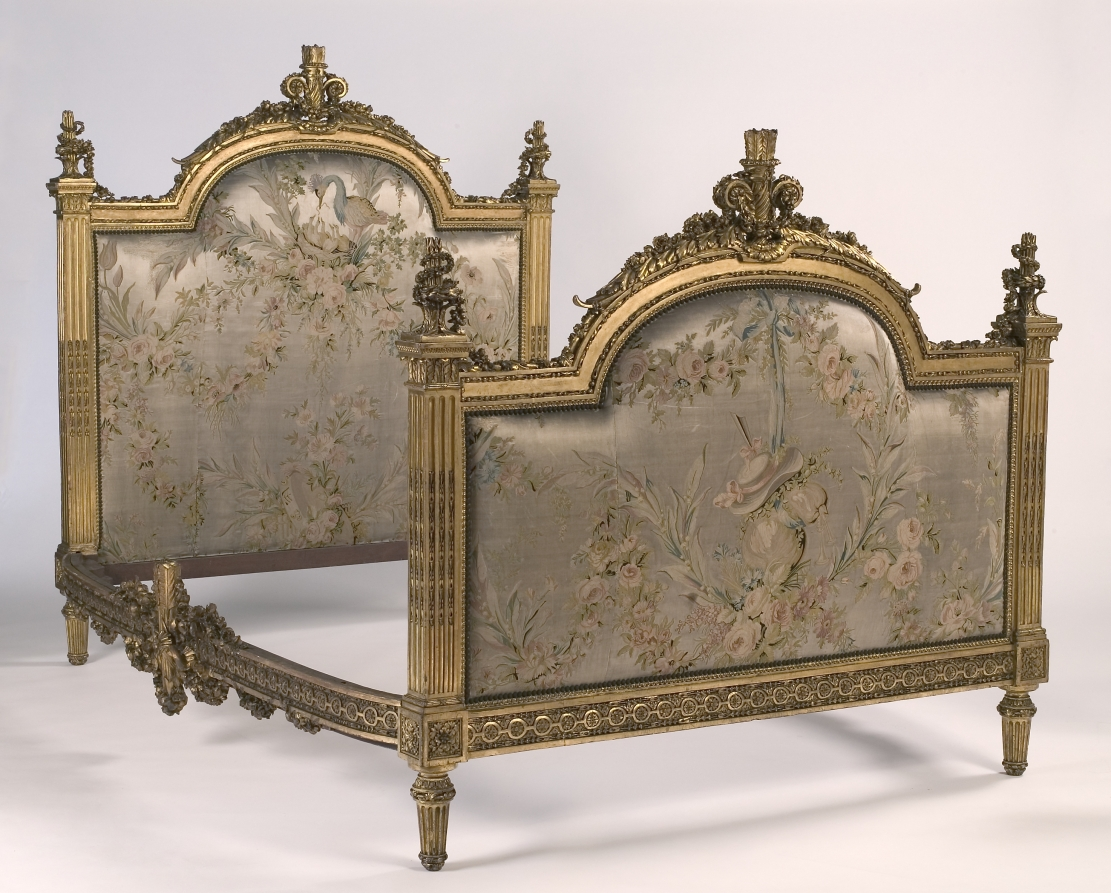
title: Bed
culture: France, 18th century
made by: attributed to Georges Jacob (French, 1739–1814)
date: 1700s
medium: gilded wood and embroidered satin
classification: Furniture and woodwork